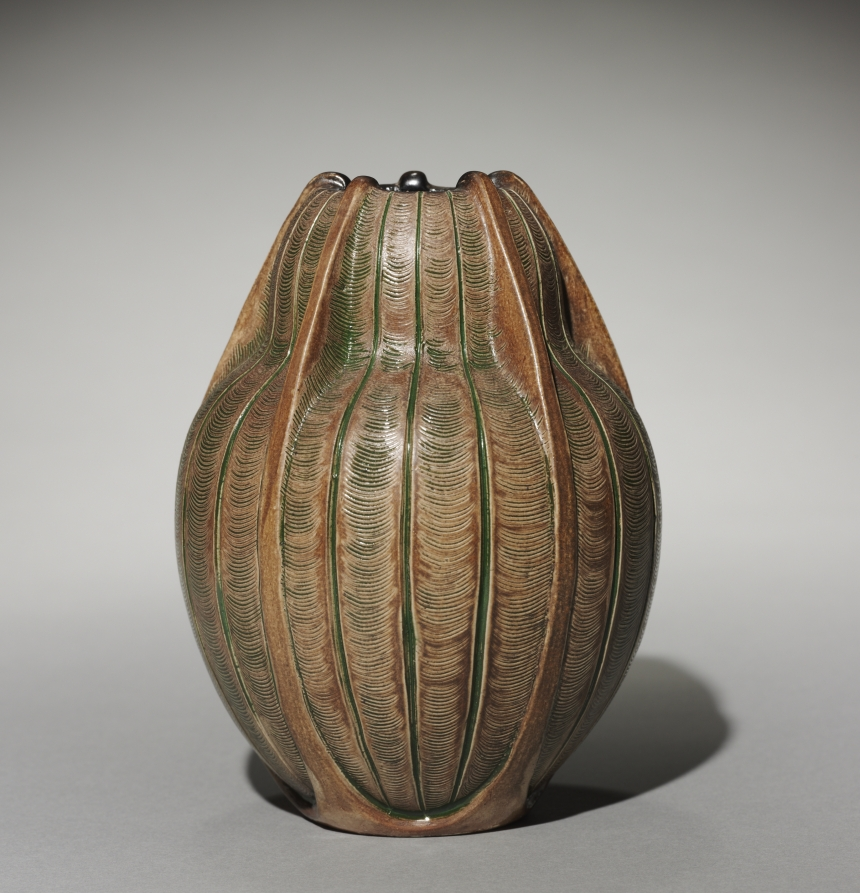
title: Vase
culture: England, early 20th Century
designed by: Edwin Martin (British, 1860–1915)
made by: Martin Brothers (British)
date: 1905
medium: stoneware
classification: Ceramic